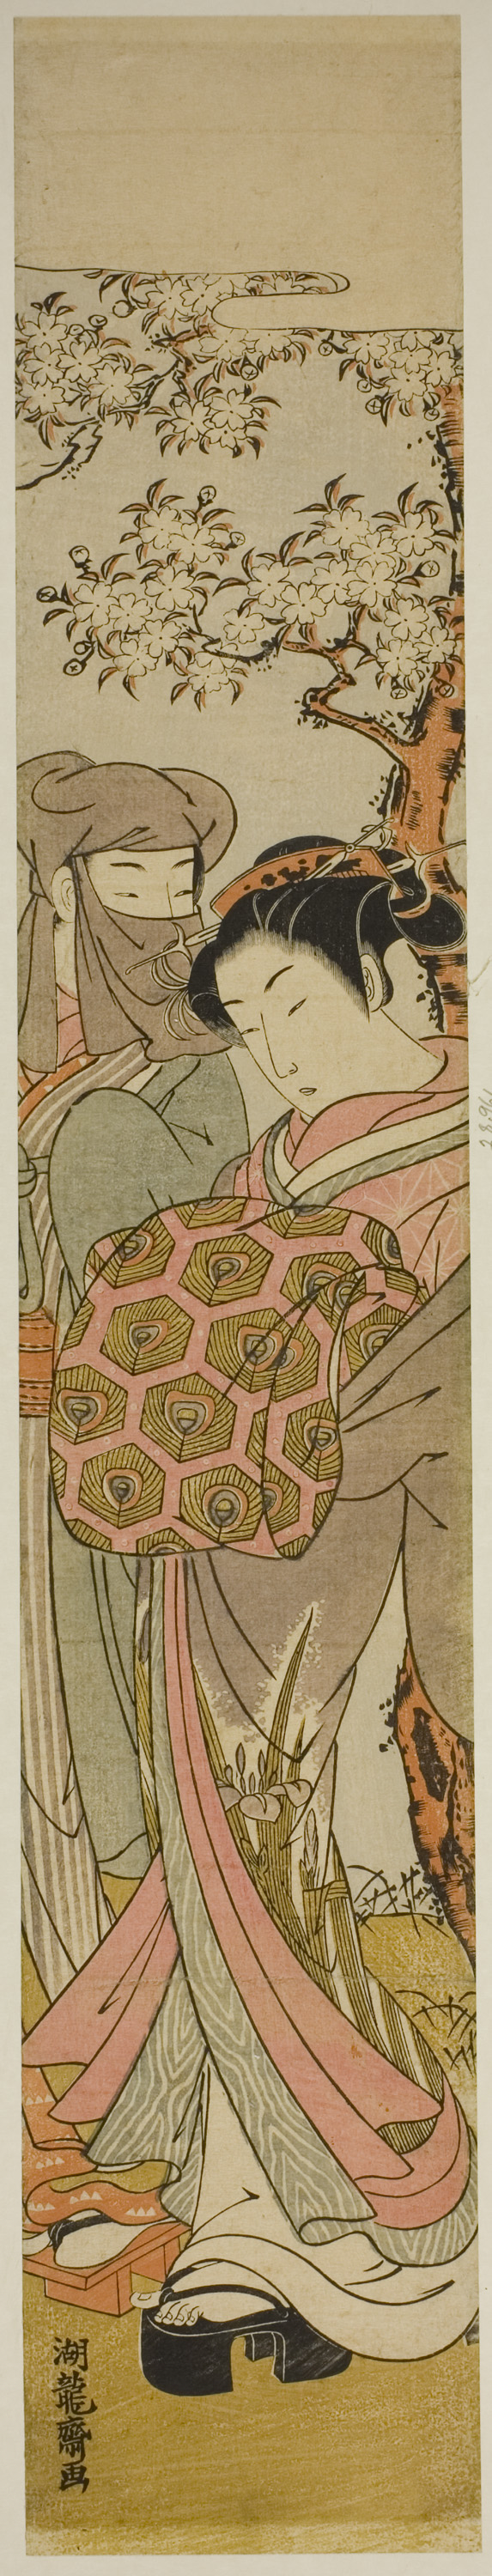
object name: Print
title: Courtesan Walking with Veiled Man under Cherry Tree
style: Japanese (culture or style)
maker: Isoda Koryusai (Japanese, 1735-1790)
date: c. 1772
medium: Color woodblock print; hashira-e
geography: Japan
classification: woodblock print; print; asian art